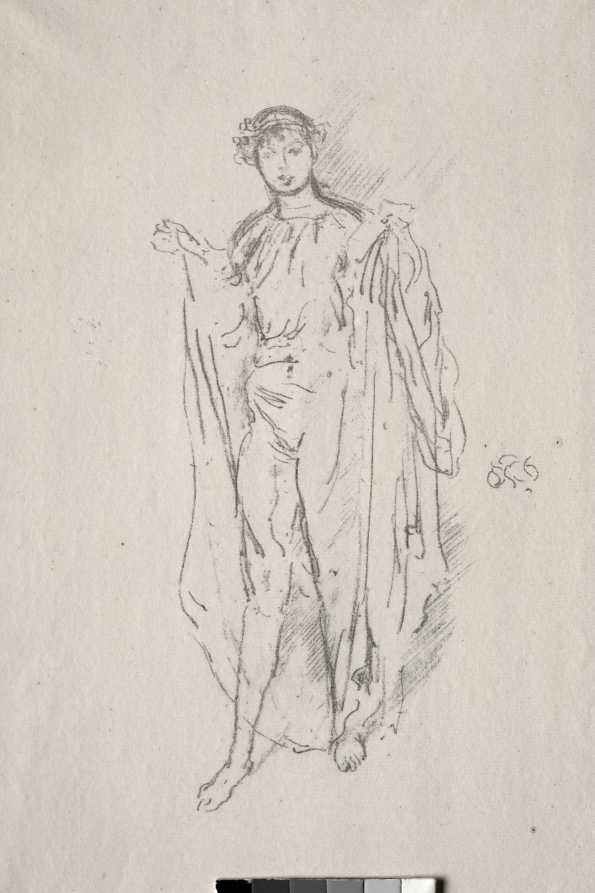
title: The Girl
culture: America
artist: James McNeill Whistler (American, 1834–1903)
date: 1891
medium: lithograph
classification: Print